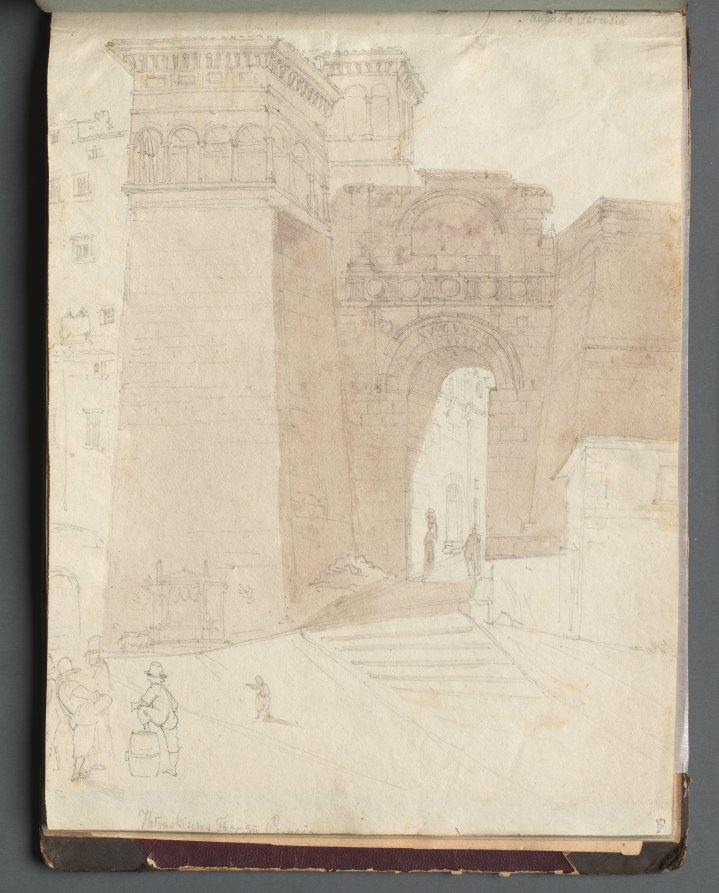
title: Album with Views of Rome and Surroundings, Landscape Studies, page 50a: Roman Architectural View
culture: Germany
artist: Franz Johann Heinrich Nadorp (German, 1794–1876)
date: c. 1830s-70s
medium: graphite with brown wash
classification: Bound Volume